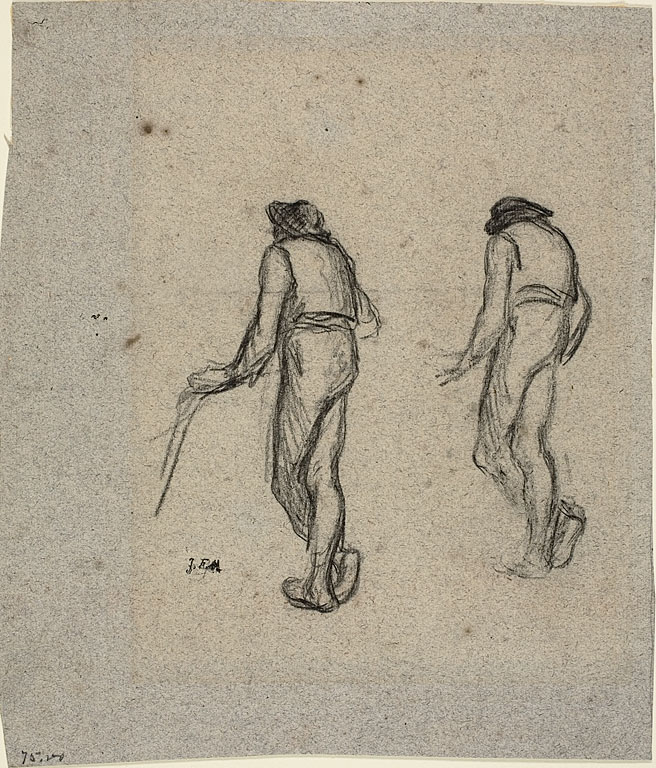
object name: Drawing and Watercolor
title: Two Sketches of a Peasant, seen from Behind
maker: Jean François Millet (French, 1814-1875)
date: 1850/1852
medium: Charcoal, on gray laid paper with blue fibers, laid down on tan wove paper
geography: France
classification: charcoal; drawings (visual works); prints and drawing